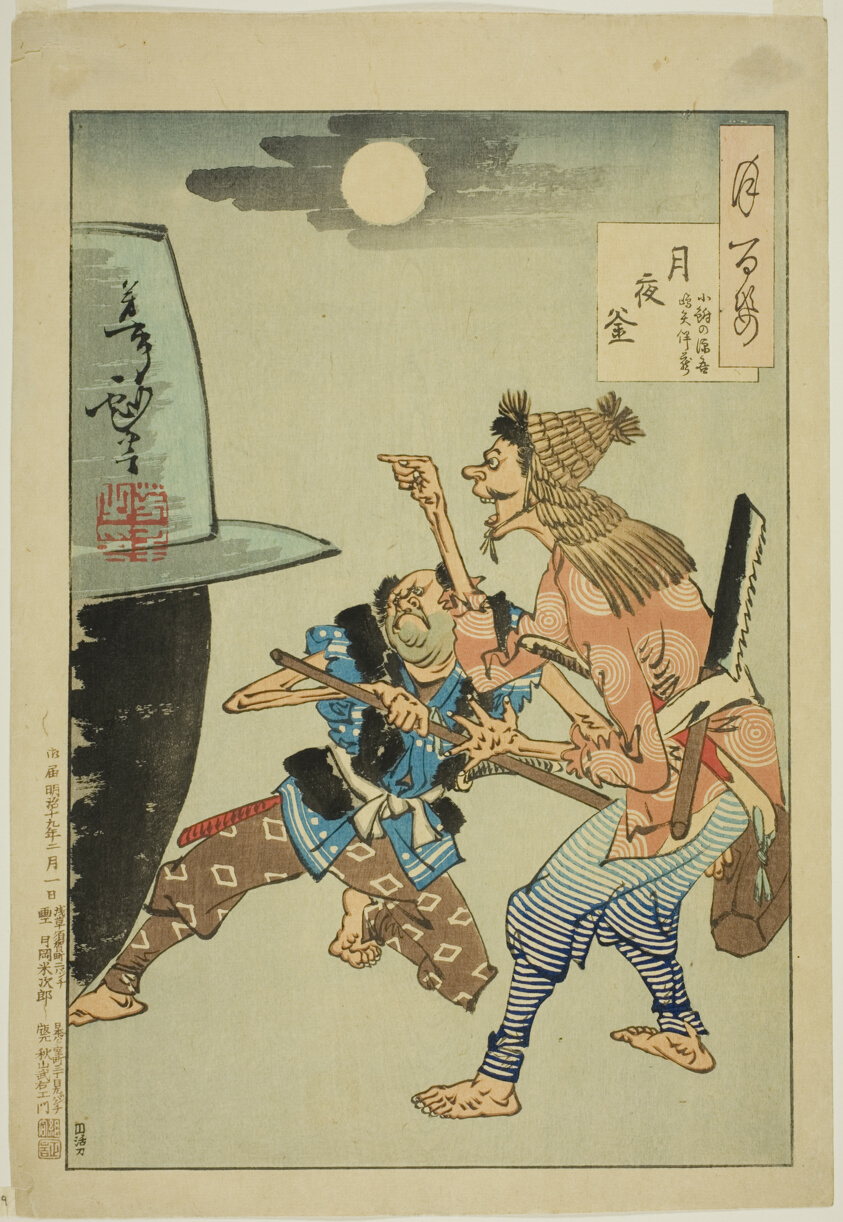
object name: Print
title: A Cauldron on a Moonlit Night (Tsukiyo no kama), from the series "One Hundred Aspects of the Moon (Tsuki hyakushi)"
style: Japanese (culture or style)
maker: Tsukioka Yoshitoshi (Japanese, 1839–1892)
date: 1886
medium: Color woodblock print; oban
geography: Japan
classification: woodblock print; print; asian art